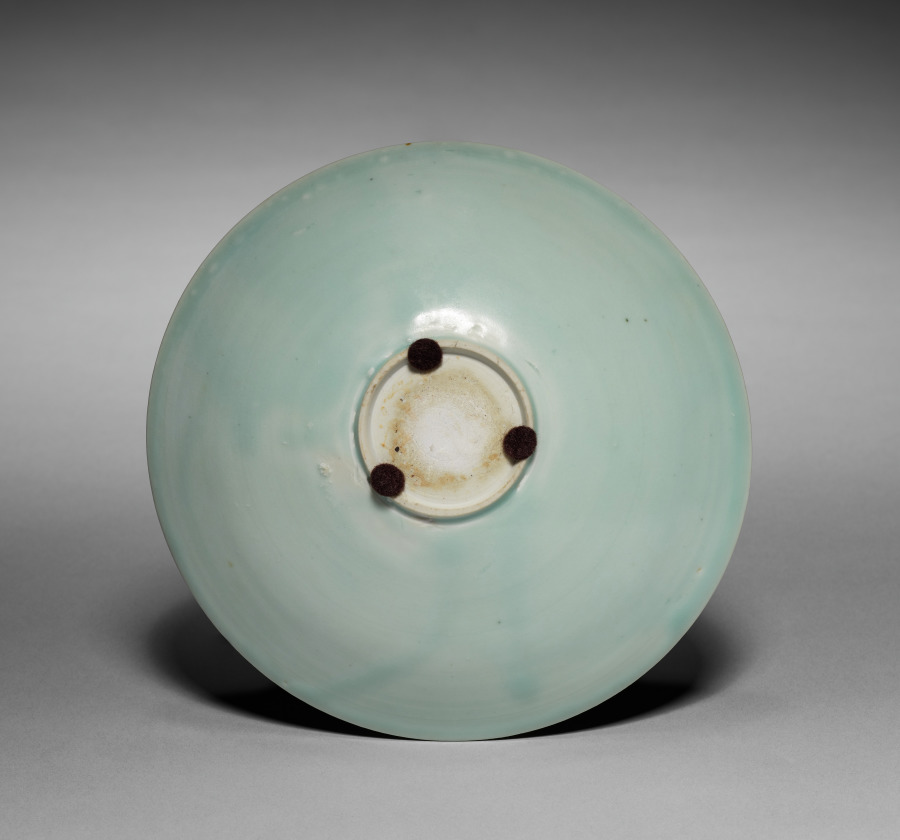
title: Dish with Carved Floral Design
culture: South China, Southern Song dynasty (1127–1279)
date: 1100s–1200s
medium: Porcelain with pale bluish-white (qingbai) glaze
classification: Ceramic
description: This shallow and wide bowl and the conical one (CMA 2020.182) are both hand-incised with decoration suggesting waves, clouds, or floral sprays. All of these motifs had auspicious meaning: waves and clouds bring rain that fertilizes the fields, and flowers and plants were often associated with the beauty of human virtues. The carved and combed designs were swiftly cut with a wooden tool into the unfired leather-hard body before glazing. Once the glaze was applied, it pooled in the incised areas rendering the design more visible.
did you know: Never intended for imperial use, qingbai ware was among the first mass-produced porcelain types and became a popular export.